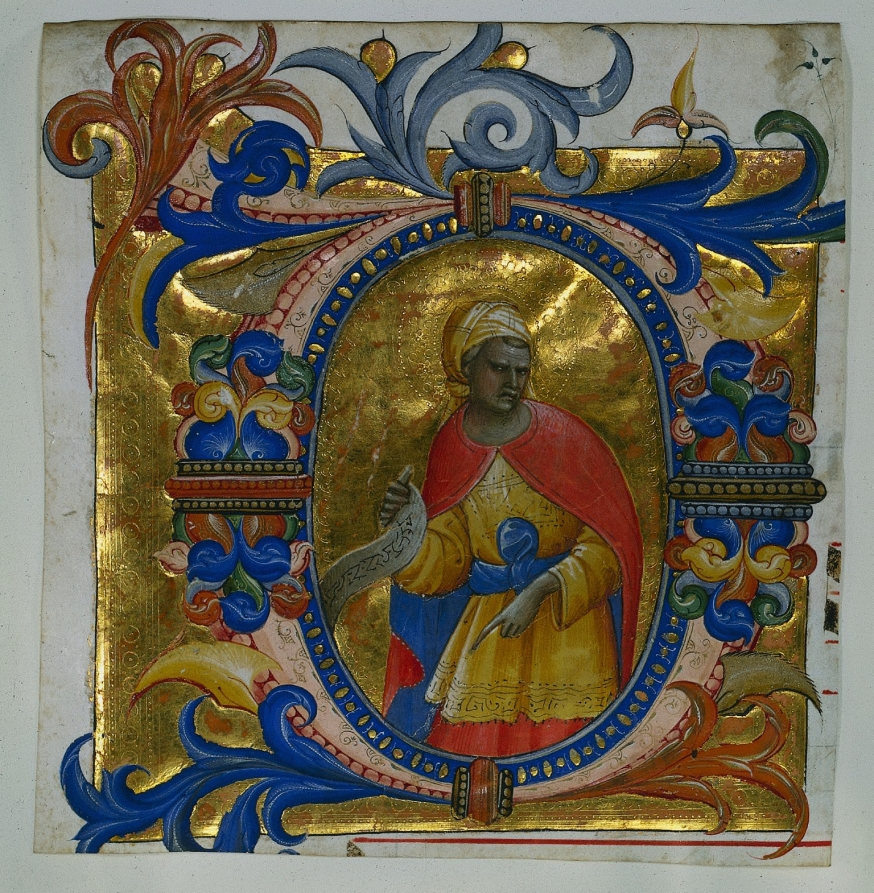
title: Initial D[eus in loco] with a Prophet Excised from a Gradual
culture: Italy, Florence, 15th century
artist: Lorenzo Monaco (Italian, c. 1370–1425)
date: 1409–10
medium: ink, tempera, and gold on vellum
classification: Manuscript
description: This jewel-like initial is one of a series of prophet portraits painted by Lorenzo in a set of choir books commissioned by the church of Santa Maria Nuova in Florence. Striking for its blue and orange-red foliage, the initial is set against a highly burnished gold ground decorated with punch marks, much like a small panel painting. The initial begins the Introit (introductory section) to the Mass for the eleventh Sunday after Pentacost: Deus in loco sancto suo (God is in his holy place). Lorenzo, who was a Camaldolese monk, produced a vast quantity of work—illuminations, panel paintings, and frescos—an indication that his art was highly esteemed and sought after during his lifetime.